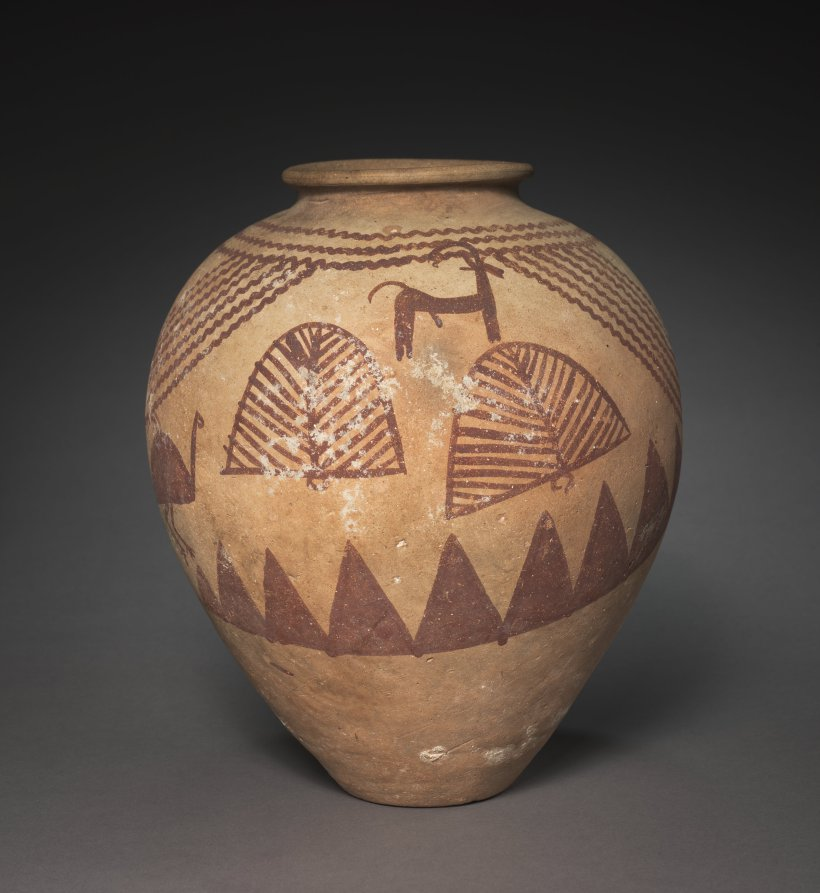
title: Storage Jar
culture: Egypt, Predynastic (5000–2950 BCE), Naqada III (3200–3000 BCE) jar, with modern painted decoration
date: 3100–2950 BCE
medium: marl clay ware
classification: Vessels